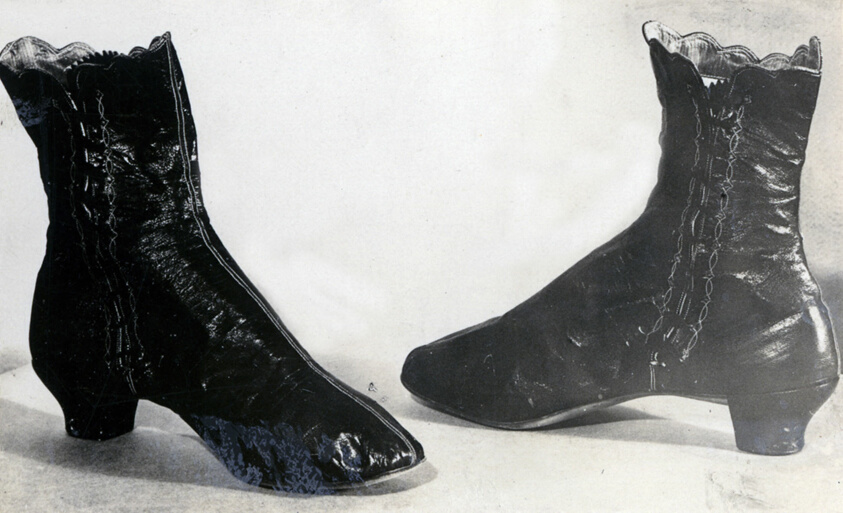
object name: Textile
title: Pair of Startups (Half Boots)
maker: United States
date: c.1870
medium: Kid leather with white stitching; laced at the side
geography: United States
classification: textile; shoes - lace; costume accessory - shoe; costume; dress (garment); clothing